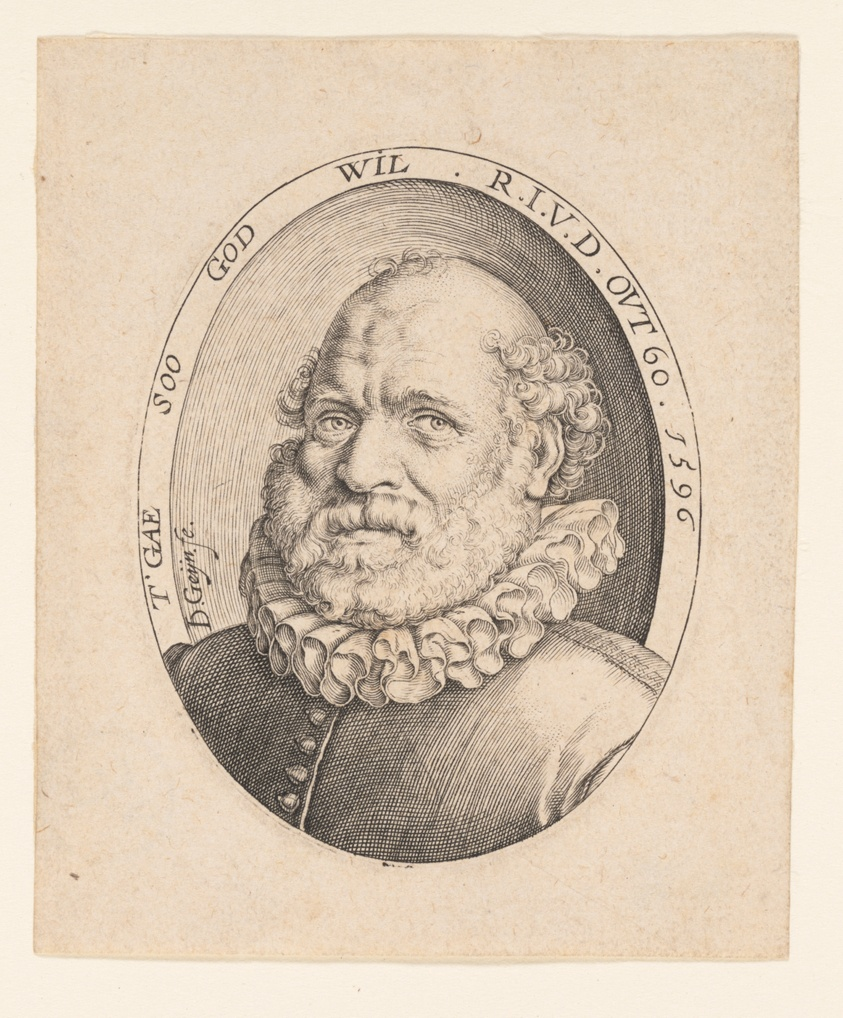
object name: Print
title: Rutgaert Janszoon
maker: Jacques de Gheyn II; Dutch, 1565–1629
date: 1596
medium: Engraving on paper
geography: Netherlands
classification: engraving; paper; print; prints and drawing